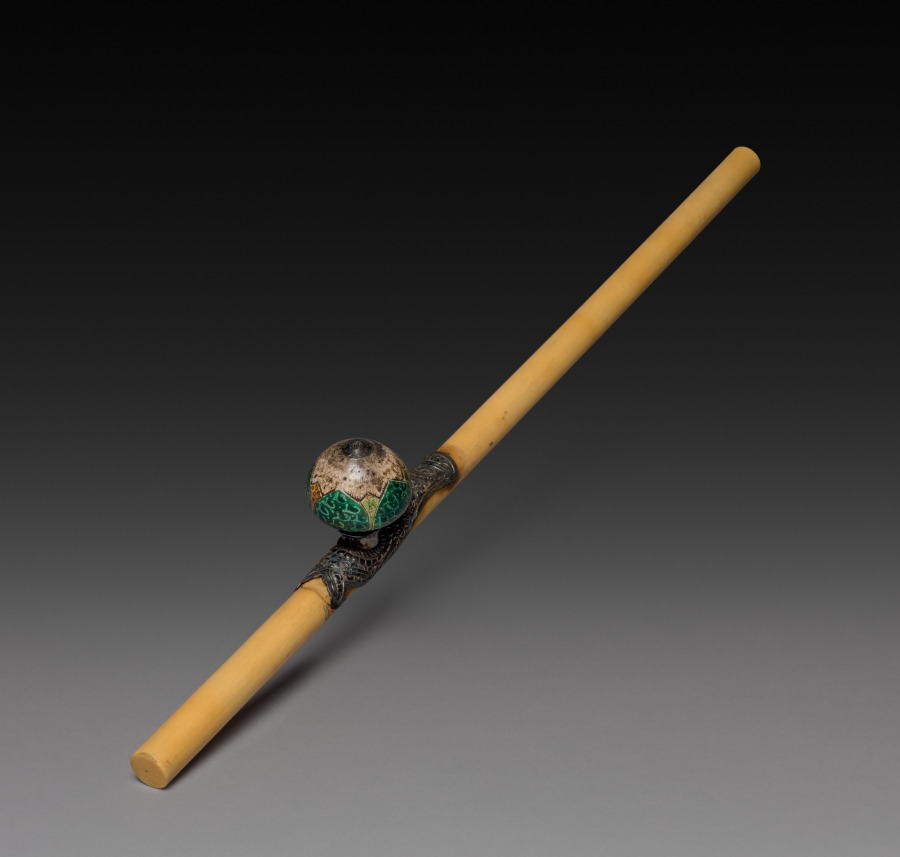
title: Opium Pipe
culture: China, Qing dynasty (1644-1911)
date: 1800s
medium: ivory stem decorated with raised design, metal repoussé work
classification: Miscellaneous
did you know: The porcelain bowl is covered with green and orange glazes.